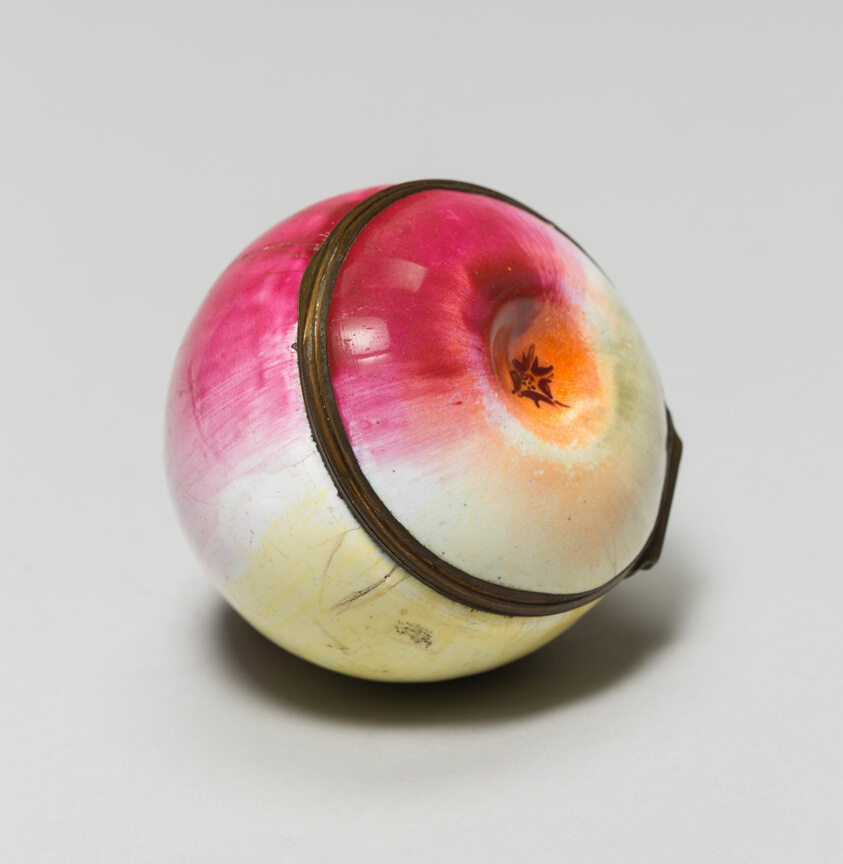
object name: Metalwork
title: Bonbonnière in the Form of a Quince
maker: Bilston, England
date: 1780/1800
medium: Polychrome enamel on copper with metal mounts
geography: Bilston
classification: enamel; metalwork